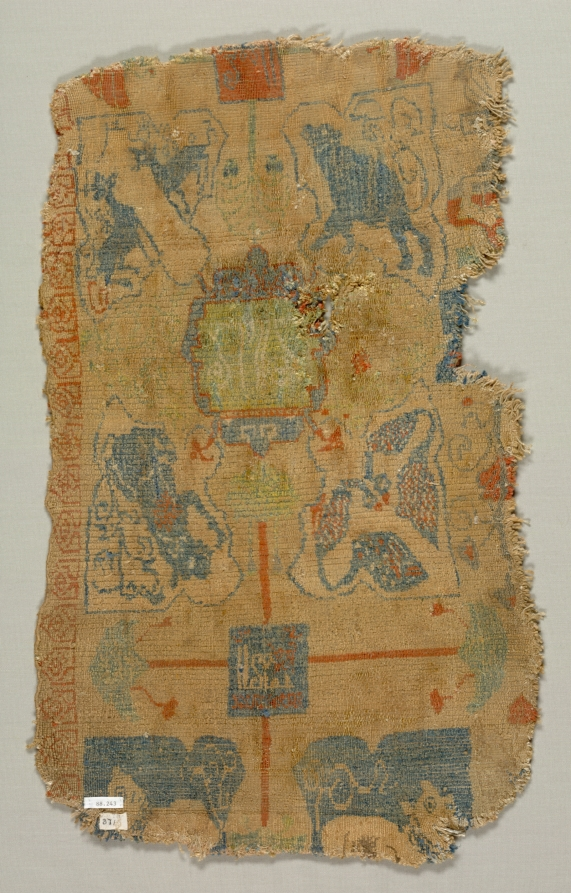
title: Carpet Fragment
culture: Iran, Rayy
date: late 1800s–early 1900s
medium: Silk: knotted pile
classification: Carpet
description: This rectangular fragment has large spade-shaped palmettes filling each corner. The palmettes bear dark blue and red animals and birds on a cream/ivory background. The central dark blue medallion encloses an irregular, inscription-bearing green square. At the top and bottom center is a smaller inscription-bearing square with date palms extending from cardinal points; vertical palms divide the rectangle, and horizontal palms delineate the start of a new repeat wherein palmettes have dark blue background with cream/ivory animal figures.